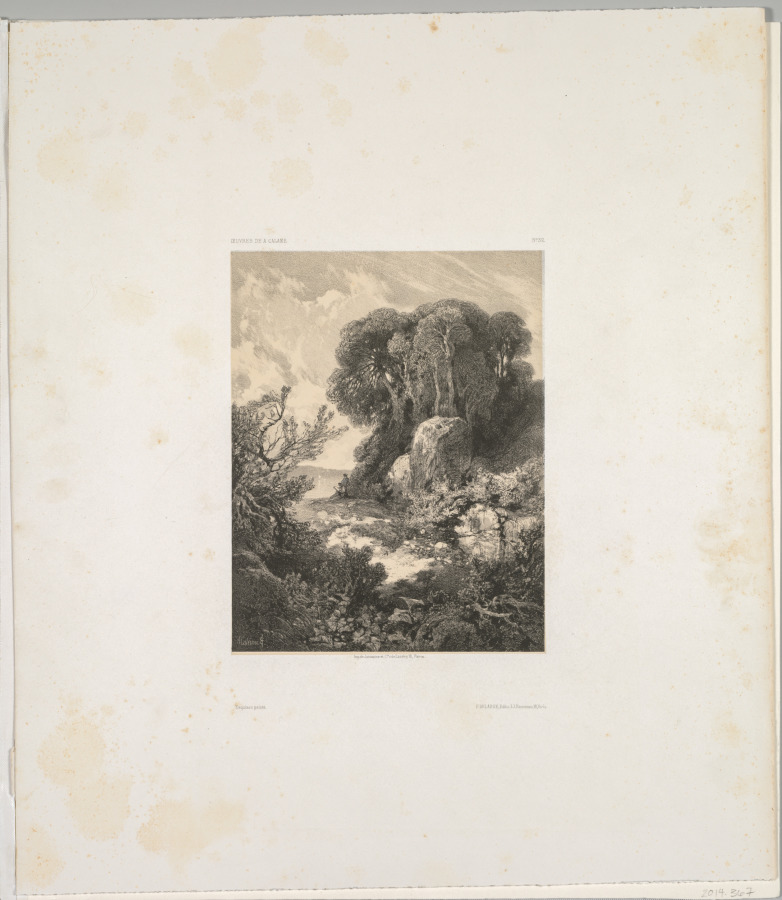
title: Oeuvres de A. Calame: No. 52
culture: Switzerland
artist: Alexandre Calame (Swiss, 1810–1864)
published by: F. Delarue, r. J.J. Rouseau, 18, Paris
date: c. 1850–60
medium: color lithograph on chine collé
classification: Print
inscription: On plate; upper left corner: Oeuvre de A. Calame.; upper right: No. 52; below image center: Imp.lith.de Jacomme & Cie. R. de Lancry, 16.; below image left: Esquisse peinte., below image right: F. Delarue. Edit.r.JJ.Rousseau. 18.Paris